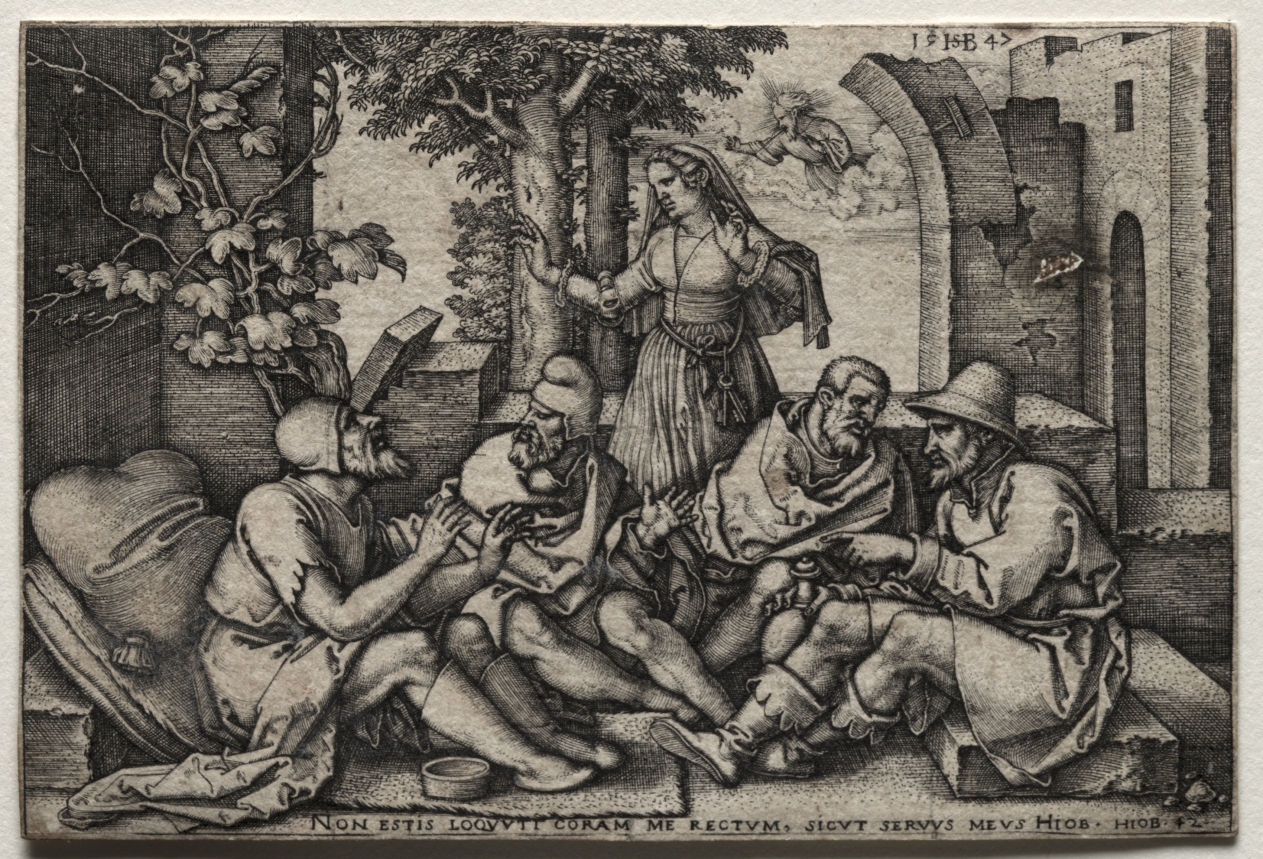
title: Job and His Friends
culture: Germany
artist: Hans Sebald Beham (German, 1500–1550)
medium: engraving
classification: Print